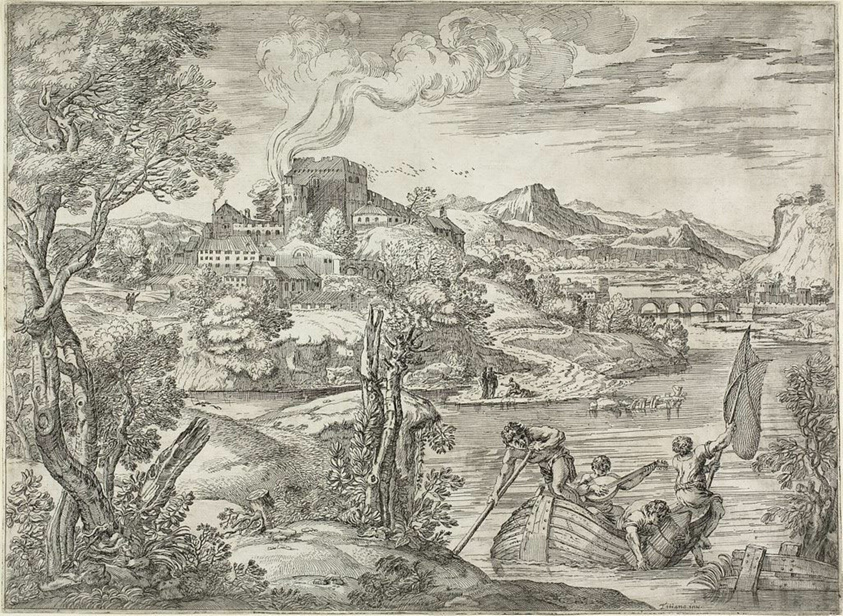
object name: Print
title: Landscape with a Luteplayer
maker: Unknown artist; after Giovanni Francesco Grimaldi (Italian, c. 1606-1680); after Titian (Italian, c. 1488-1576)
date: 1627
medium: Etching on ivory laid paper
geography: Venice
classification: etching; print; prints and drawing